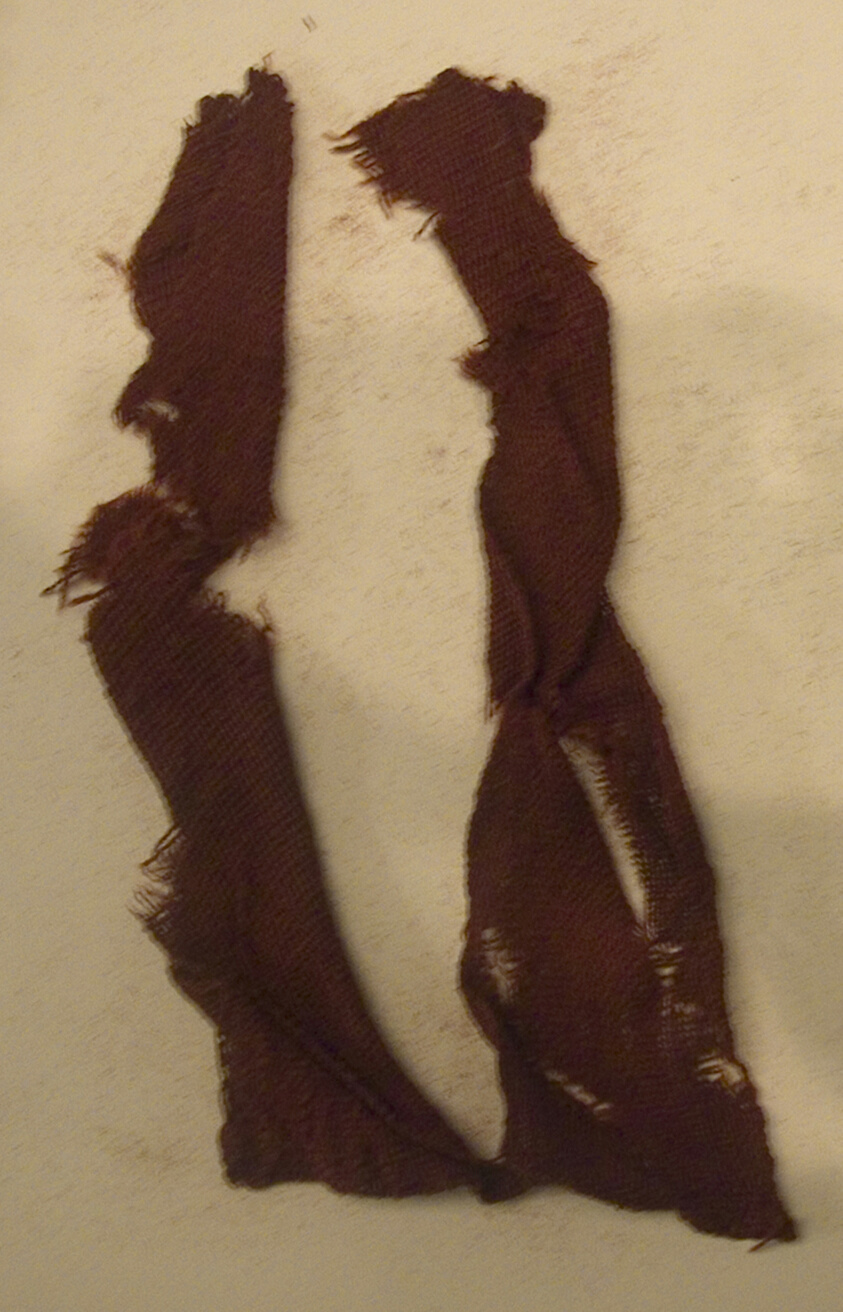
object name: Textile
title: Fragment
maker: Peru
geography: Peru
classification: textile; weaving